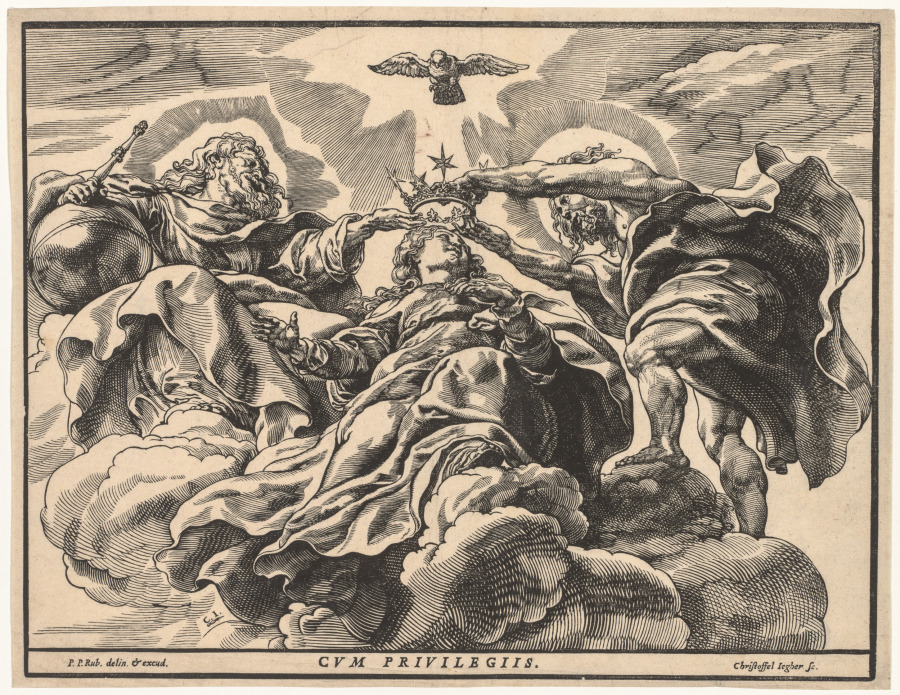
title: Coronation of the Virgin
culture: Flanders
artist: Christoffel Jegher (Flemish, 1596–1652/53)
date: 1632–36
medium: woodcut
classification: Print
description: Peter Paul Rubens was as astute a businessman as he was a brilliant painter. He realized that substantial profit and fame could be derived from the publication of prints made after his paintings. He employed engravers and also Jegher, who made nine woodcuts after the master's work. While the engravings were always considered merely reproductive, the woodcuts were conceived and appreciated as original works of art because they exhibited the freedom and directness of expression lacking in the intaglio prints. Rubens revived the tradition of large-scale woodcuts, which had flourished in 16th-century Italy and the Netherlands but lagged in the following decades. Jegher's prints after Rubens are the only such large, single compositions in Flanders in the 17th century. They are also his most outstanding creations.